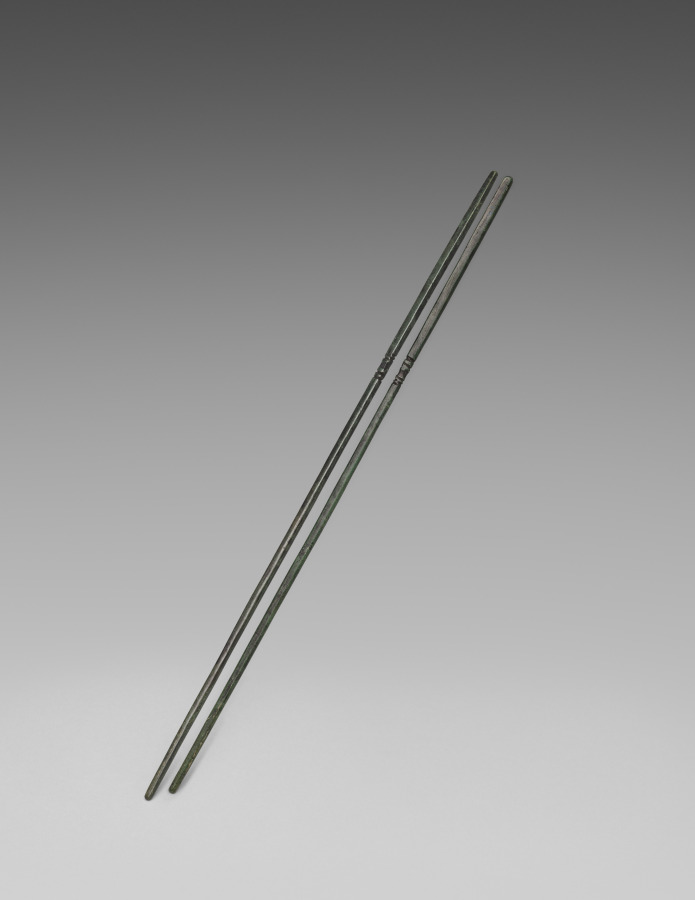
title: A Pair of Chopsticks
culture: Korea, Goryeo dynasty (918–1392)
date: 918–1392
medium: bronze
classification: Metalwork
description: In Korea, chopsticks made of metal such as brass, silver, and gold were excavated from ancient tombs and ruins dated to the 6th century at the earliest. Burial goods often include utilitarian objects such as table wares and utensils because the dead were believed to need them in the afterlife.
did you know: In contrast to the Chinese and Japanese, Koreans still prefer metal chopsticks (stainless steel and brass) to wooden ones.